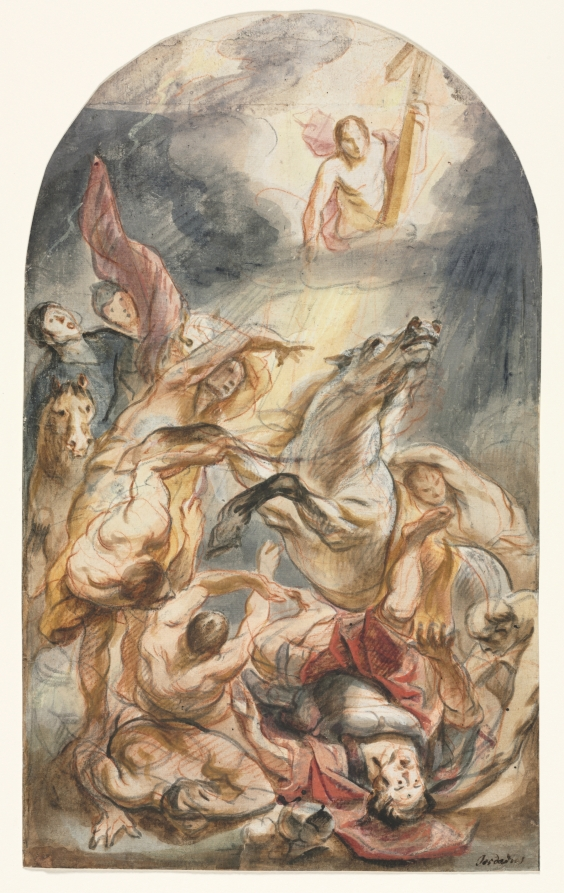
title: The Conversion of Saul with Christ and the Cross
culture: Flanders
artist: Jacob Jordaens (Flemish, 1593–1678)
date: c. 1645–47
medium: brush and brown wash, gouache and watercolor over black and red chalk, heightened with traces of white; framing lines in graphite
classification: Drawing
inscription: lower right, in brown ink: Jordaens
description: Jacob Jordaens was a prominent artist working in Antwerp in the 17th century. Though influenced in his use of powerful forms and vibrant color by his contemporary, Peter Paul Rubens, Jordaens was notably more realist in his tendencies. This drawing and its companion drawing in the Cleveland Museum of Art's collection (1954.366) are very likely studies for a painting depicting the Conversion of Saint Paul that Jordaens made for the the abbey church at Tongerlo, near Antwerp, in around 1647 (now lost). According to the Bible, in the year following the death of Jesus Christ, Saul of Tarsus (who became Saint Paul) was on the road to Damascus. He was suddenly surrounded by a brilliant light from above, heard the voice of Christ, and became a believer. In this work, Saul appears to have been blinded by the force of Christ's voice and heavenly light. Jordaens used a combination of chalks and wet media such as ink and watercolor to create a swirling mass of bodies bathed in light.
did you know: In order to create the arch at the top of this sheet, which is almost a foot high, the artist added an additional sheet of paper.